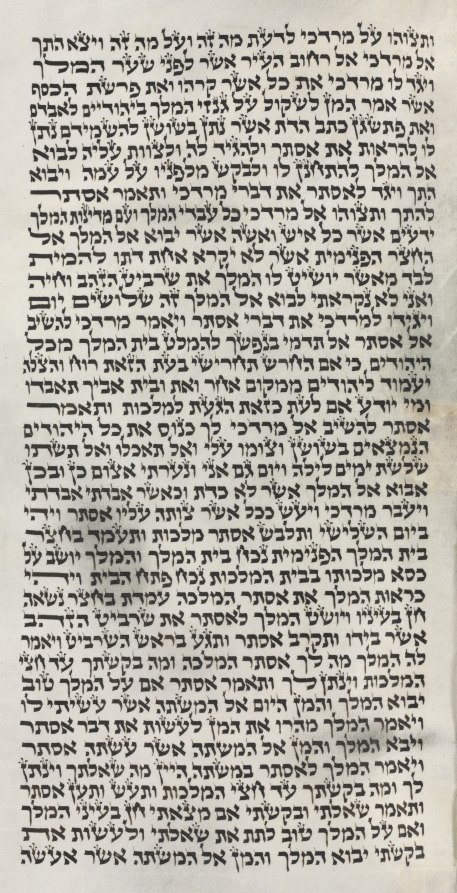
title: Scroll of Esther for the Purim Festival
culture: Europe (Eastern?), Hebrew, 19th century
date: c. 1850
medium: ink on vellum (eight columns, 39 lines of text on three membranes)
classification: Manuscript